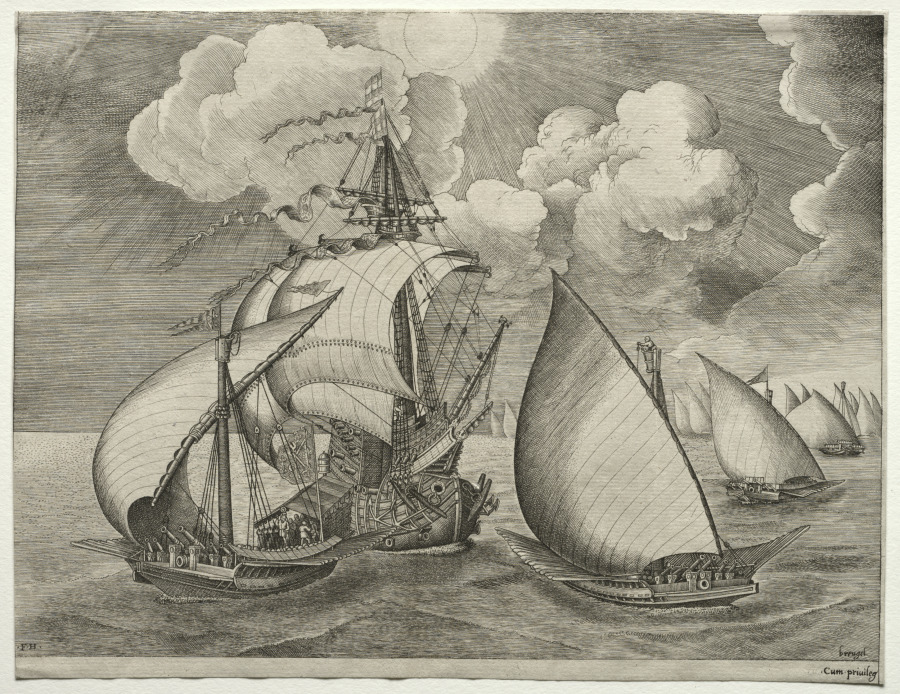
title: Sailing Vessels: A Fleet of Galleys Escorted by a Caravel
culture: Flanders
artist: after Pieter Bruegel (Netherlandish, c. 1525/30–1569)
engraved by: Frans Huys (Flemish, 1522–1562)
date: 1561–65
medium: engraving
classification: Print